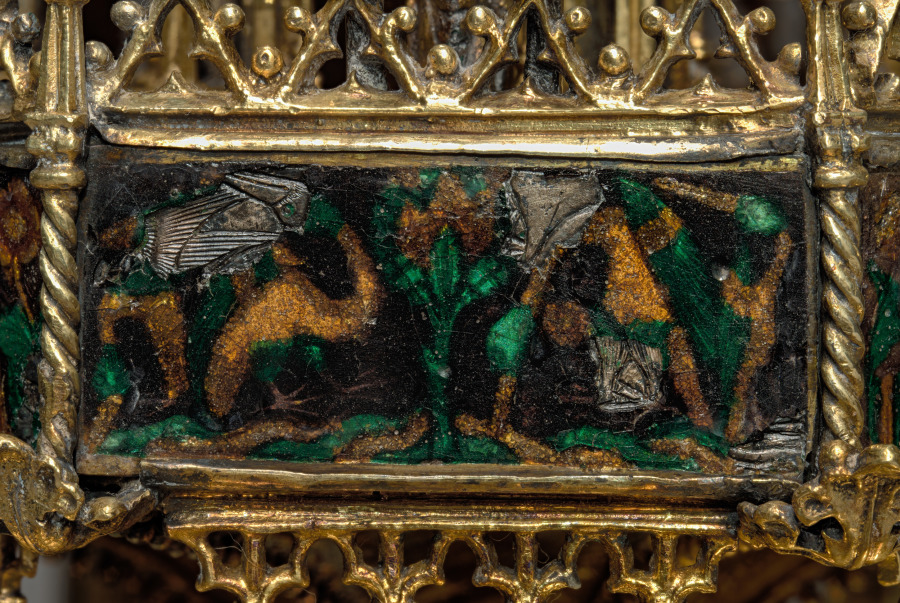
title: Table Fountain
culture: France, Paris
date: c. 1320–40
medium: gilt-silver and translucent enamels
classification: Metalwork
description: Conceptually and stylistically, this object is beyond all else a piece of Gothic architecture in miniature with vaults, pinnacles, columns, and traceried arches. Though the artist who created it is unknown, he was unquestionably inspired by the great Gothic buildings of his time. The table fountain is a three-tiered assembly combining cast elements with bent sheets of gilt-silver. To these have been attached a series of enamel plaques representing grotesque figures, some of which play musical instruments. Water wheels and bells were added to capture motion and sound. The rich detail, precious materials, and involved ornamentation of this deluxe object suggest it would have been expensive to produce and highly treasured by its original owner, someone of high status, and would have been deployed as an object of spectacle. This is the most complete example of its type known to survive from the Middle Ages. Medieval inventories reveal that small fountains like this, often taking various forms, and generally made from precious metals, once existed in large numbers, thus making the Cleveland table fountain an extremely rare object.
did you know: This fountain with its minute architectural details and finely made enamel plaques displayed the wealth and refinement of the owner as it entertained his guests. Imagine hearing the ringing of the tiny bells when this fountain was in use.